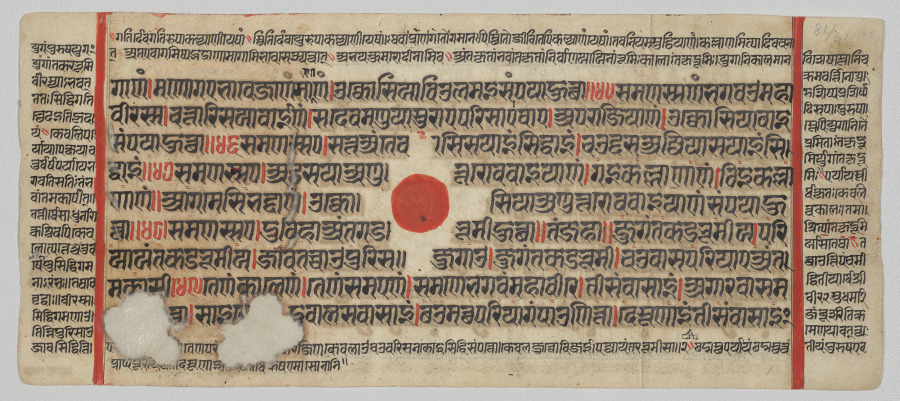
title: Text, Folio 43 (recto), from a Kalpa-sutra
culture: Western India, Gujarat, last quarter of the 15th century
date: c. 1475–1500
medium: Gum tempera, ink, and gold on paper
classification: Painting